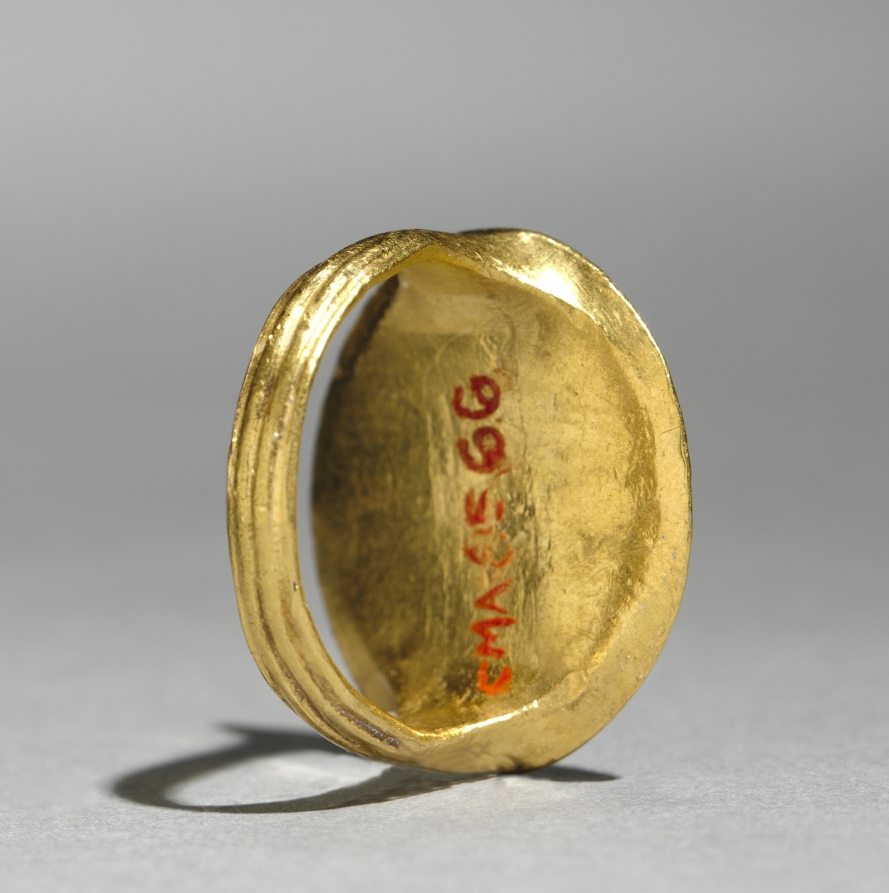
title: Finger Ring with Figure of Nike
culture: Greece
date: 300s BCE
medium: gold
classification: Jewelry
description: The figured carved on the upper portion of this gold ring represents Nike, the Greek goddess of victory. She faces right in contrapposto with one hand behind her back while the other, outstretched, displays a wreath. The goddess is exquisitely engraved, with separately modeled locks of hair and individual feathers on her wings. Engraved rings were worn both as jewelry and as personal signatures, since the engraved image could be pressed to create a seal.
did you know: The ancient Greek pronunciation of Nike is NEE-kay.